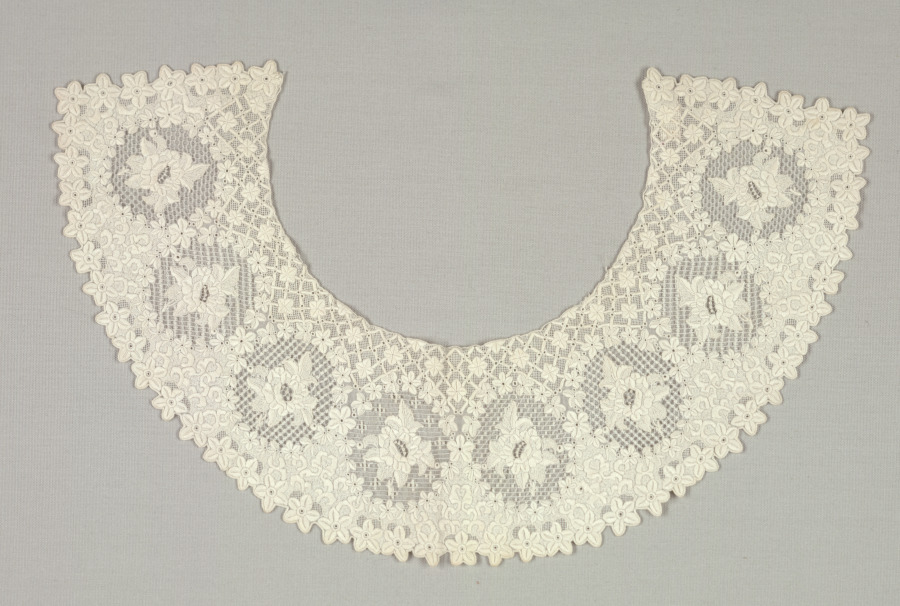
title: Collar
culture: France or Switzerland, 1800s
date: 1800s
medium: Cotton: needle lace (drawnwork) and embroidery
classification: Embroidery